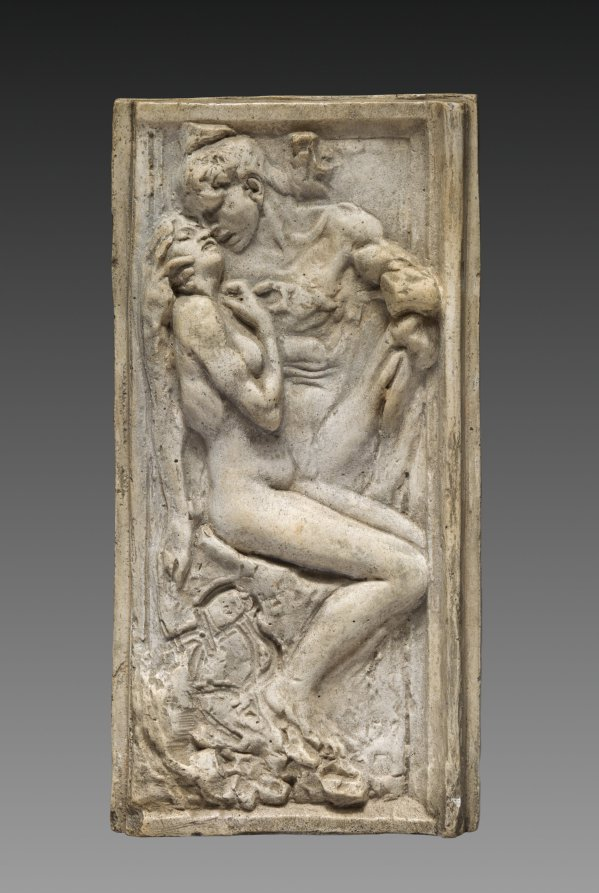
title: Lovers (Les amants)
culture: France, 19th century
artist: Auguste Rodin (French, 1840–1917)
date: c. 1880 – 1885 (original model)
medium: plaster varnished pale buff color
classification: Sculpture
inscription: signed in pencil on back: "A Loie/Rodin."